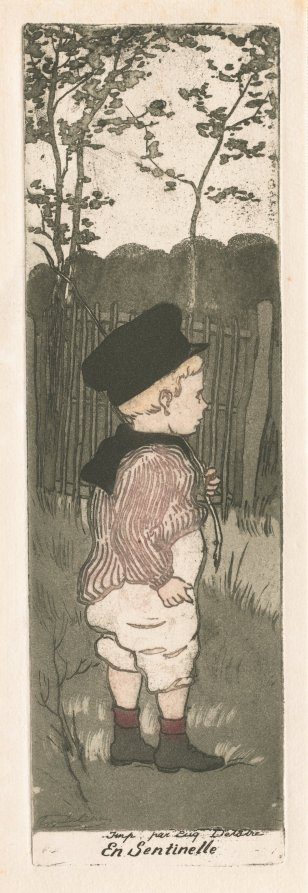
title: On Sentry Duty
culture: France, late 19th - early 20th century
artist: Eugène Delâtre (French, 1864–1938)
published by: Zeitschrift für Bildende Kunst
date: c. 1905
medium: color aquatint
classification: Print